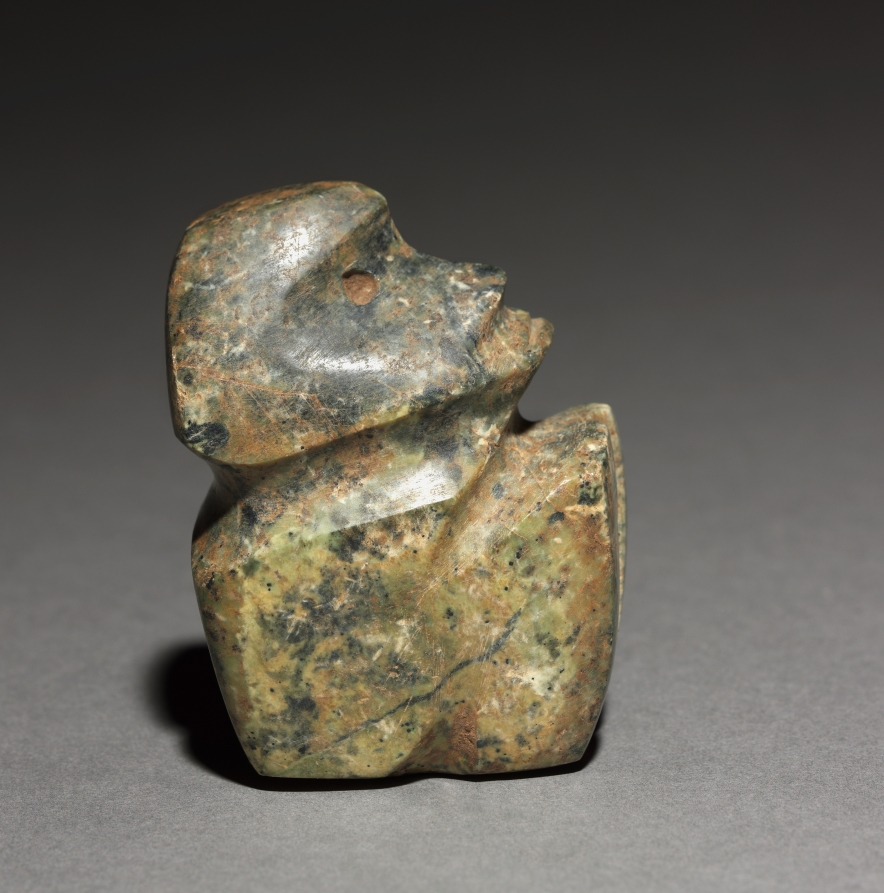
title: Seated Figure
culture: Mesoamerica, Mexico, Guerrero, Mezcala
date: 100 BCE–300 CE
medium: serpentine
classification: Sculpture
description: The Mezcala style takes its name from a river in its homeland, the Guerrero region of western Mexico. The style is known for small-scale sculptures characterized by sleek abstraction and often made of greenstone, one of the most precious materials that Mesoamerican artists worked. Unfortunately, little is known of the sculptures’ meanings and archaeological contexts.